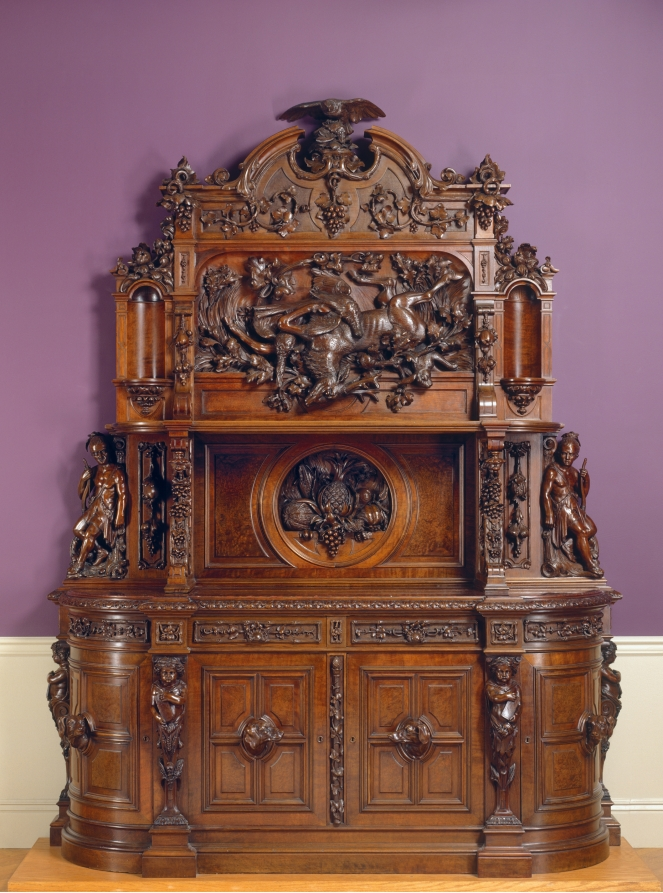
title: Sideboard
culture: America, Pennsylvania, Philadelphia?, 19th century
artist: attributed to Joseph Alexis Bailly (American, 1825–1883)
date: c. 1855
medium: walnut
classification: Furniture and woodwork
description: Newly acquired wealth from railroad production, manufacturing, and an expanded economy produced a new elite class of Americans who looked abroad for sources of decoration to adorn their lives. Grand, baronial furniture, reminiscent of German hunting lodges or French castles, became popular during the mid 1800s among America’s wealthy. Elaborate displays of abundance were reflected in the carvings of flora, fauna, and freshly hunted game. The depictions of Native American hunters on this example, most likely made in Philadelphia, may have meant that this piece was displayed at one of the many international expositions that occurred during this period.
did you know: Luscious fruit, wild animals, and Native American figures are masterfully carved into this walnut sideboard. These decorative adornments were created for a distinctively American taste and would have symbolized abundance and wealth to visitors who encountered it within a grand dining room.